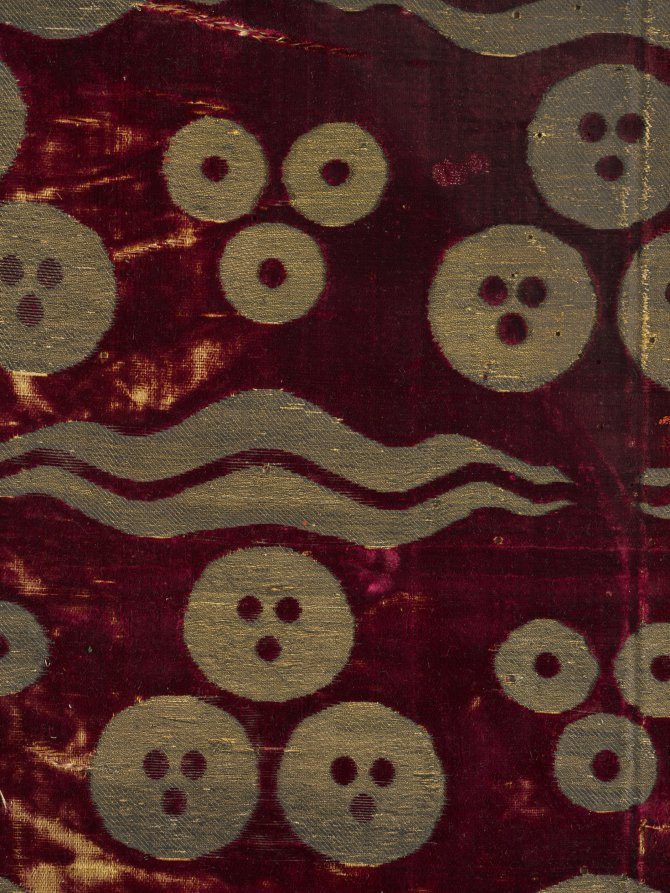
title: Brocaded velvet with chintamani design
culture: Turkey, Bursa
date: late 1400s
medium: velvet, brocaded: silk and silver-metal thread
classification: Velvet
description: This early Ottoman brocaded velvet was woven in an imperial workshop in the prosperous city of Bursa, the silk capital and major commercial center of the Ottoman Empire. It has exceptionally rich crimson silk pile, almost twice as dense as later monochrome velvets. The brocaded pattern of three balls and paired wavy bands is known as chintamani, derived from the Sanskrit word for a popular Buddhist motif, “the three jewels,” shown surrounded by flames or foliage in Buddhist art across Asia. Based on the high frequency of its use in art for the Islamic court of the Ottoman Turks, it appears to have been a favored motif and possibly even an unofficial imperial emblem.